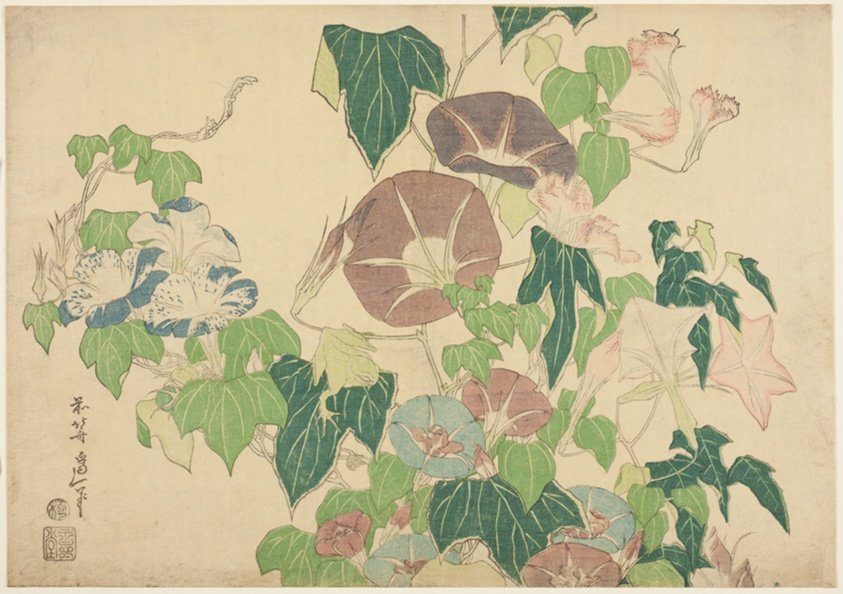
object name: Print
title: Morning Glories and Tree-frog, from an untitled series of Large Flowers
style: Japanese (culture or style)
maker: Katsushika Hokusai 葛飾 北斎; Japanese, 1760-1849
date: c. 1833/34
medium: Color woodblock print; oban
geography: Japan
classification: woodblock print; print; asian art